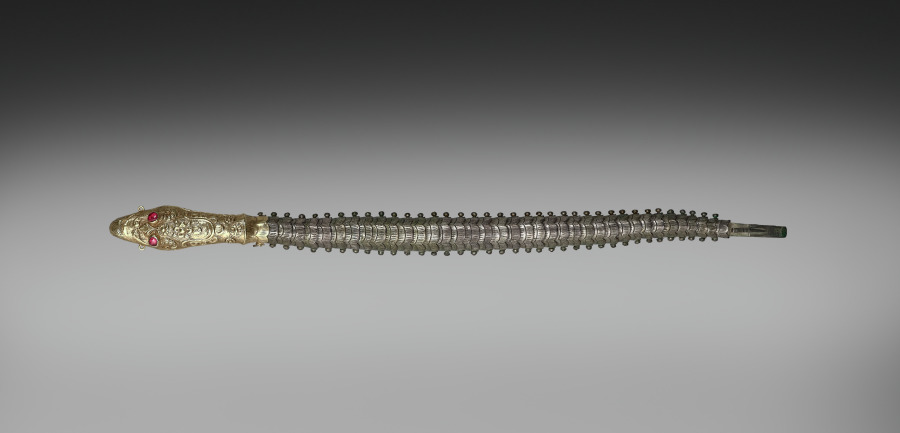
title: Bracelet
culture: Siam (?)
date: 1800s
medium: silver gilt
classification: Jewelry